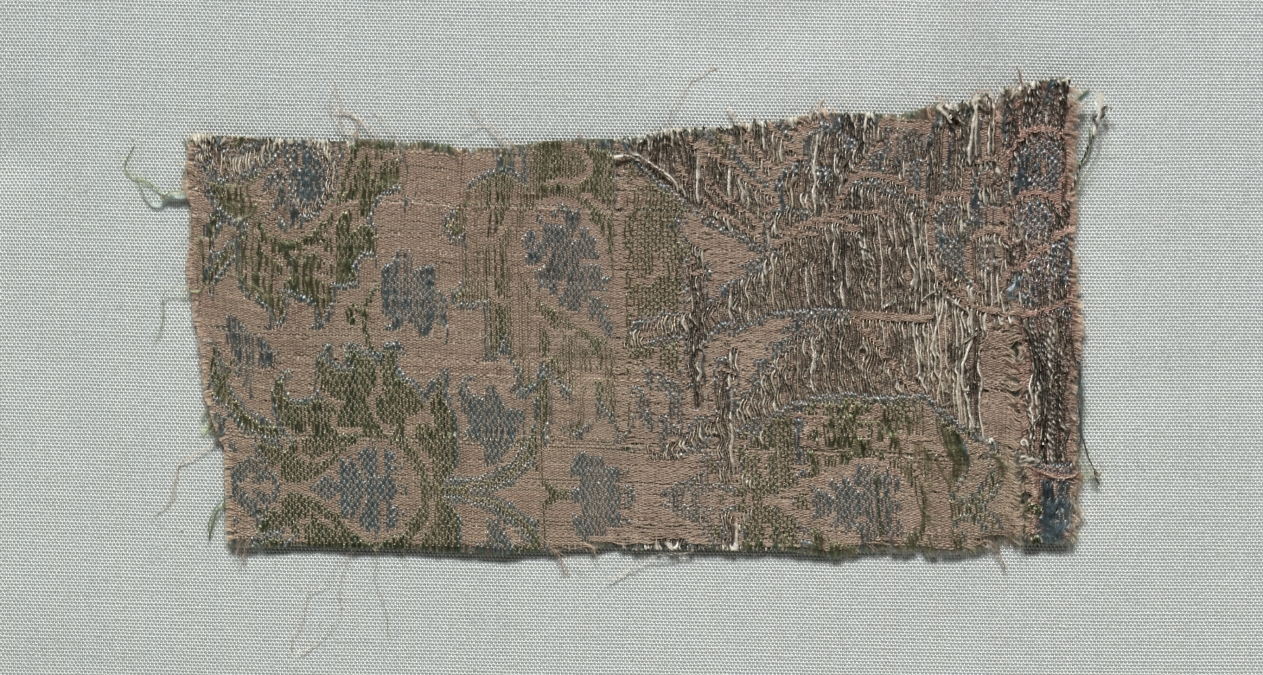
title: Three Fragments of Italian Gothic Silk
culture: Italy, second half of 14th century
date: 1350–1399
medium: lampas weave, brocaded; silk and gold thread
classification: Textile